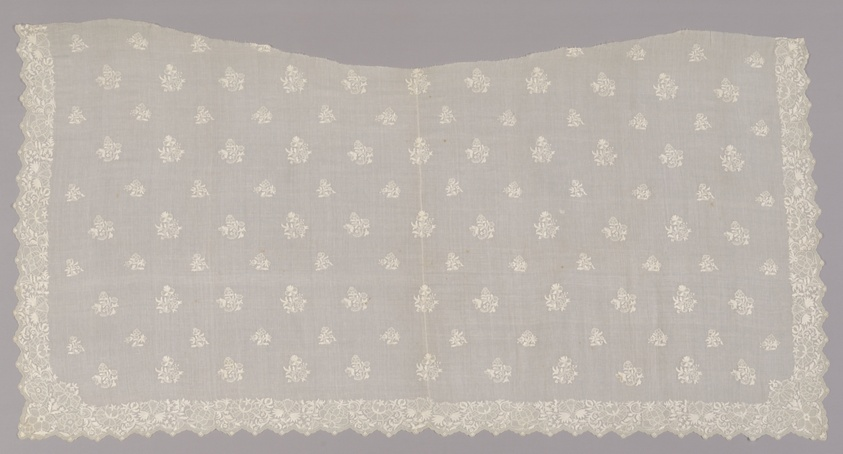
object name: Costume and Accessories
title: Apron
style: 18th Century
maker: England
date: 1760s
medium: Cotton, plain weave; drawnwork and embroidery in cotton, satin, buttonhole, chain, and double chain stitches with linen thread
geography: England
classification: textile; costume accessory; needlework (visual works); costume; dress (garment); clothing; apron (main garment); costume - embroidery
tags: flowers, floral patterns, floral, floral motifs